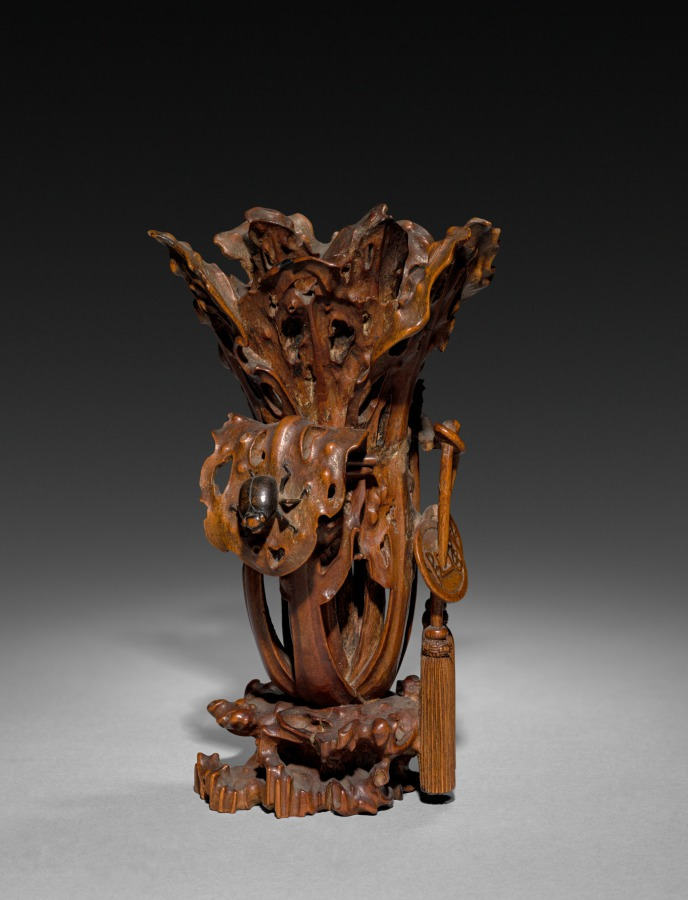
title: Cabbage and Beetle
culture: China, Qing dynasty (1644–1911), Qianlong reign (1736–95) or earlier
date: mid-1700s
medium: carved wood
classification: Wood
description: In the Qing dynasty (1644–1911), luxury items became more affordable to larger parts of the society, including women, merchants, and literati in non-official positions. Imperial patronage and a growing urban population encouraged consumption of luxury goods and local craftmanship. A superbly skilled carver created this small decorative object, reflecting scholarly taste of the period. This cabbage on a gnarled rock was carved from single piece of wood. There are openings between the stems, holes in leaves, and the rock it rests on. A beetle perches on one leaf which curves over the binding cord. The beetle was painted dark brown, while the cabbage and rock were finished overall with lighter tone.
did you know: Cord binds the cabbage loosely at the middle and goes through carved coins before ending in tassels.